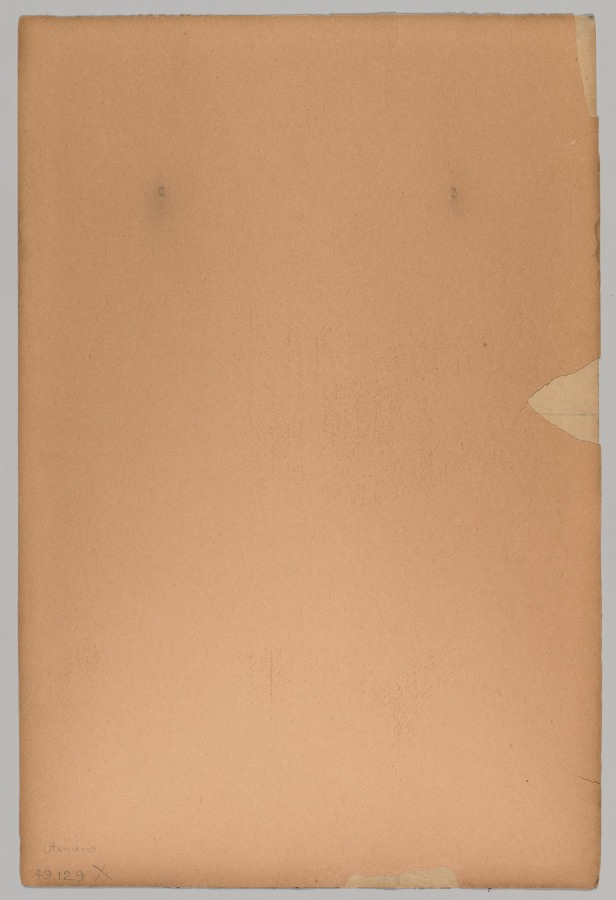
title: No Title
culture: Japan, Edo period (1615–1868)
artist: Kitagawa Utamaro (Japanese, c. 1754–1806)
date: 1753–1806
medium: color woodblock print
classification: Print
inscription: Signature: Utamaro fude